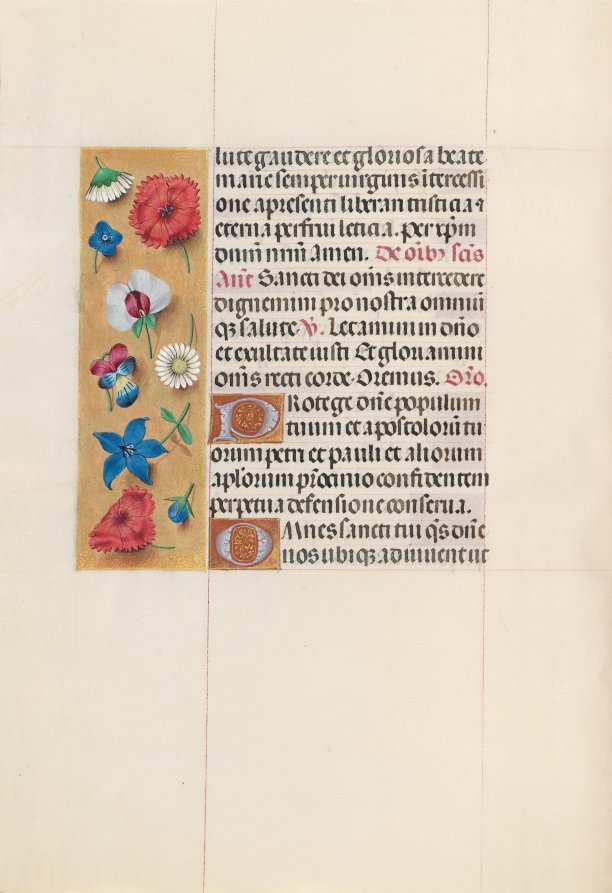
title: Hours of Queen Isabella the Catholic, Queen of Spain: Fol. 152v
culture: Flanders, Ghent and Bruges, late 15th century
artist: Master of the First Prayerbook of Maximillian (Flemish, c. 1444–1519)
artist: and Associates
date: c. 1500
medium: ink, tempera, and gold on vellum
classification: Bound Volume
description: This manuscript was illuminated by a circle of at least five highly organized manuscript painters active in the Flemish cities of Ghent and Bruges. The principal illuminator was Alexander Bening, who painted the majority of the book's miniatures. Manuscripts produced by this circle of artists are renowned for the decoration of their borders, which typically feature a rich variety of realistically-painted flowers, birds, and butterflies. This prayer book, called a book of hours, was intended not for a cleric, but for the private devotions of a lay person-in this case, Isabella the Catholic, Queen of Spain (1451-1504). Isabella's coat of arms embellishes the book's frontispiece. It is unlikely that the book was commissioned by the Queen herself; rather, she probably received it as a diplomatic gift from someone courting her patronage, perhaps Cardinal Francisco Jimenez de Cisneros. A Franciscan friar, Jimenez was dependent upon Isabella for his advancement, first to the post of Queen's confessor in 1492, and then to Archbishop of Toledo in 1495.